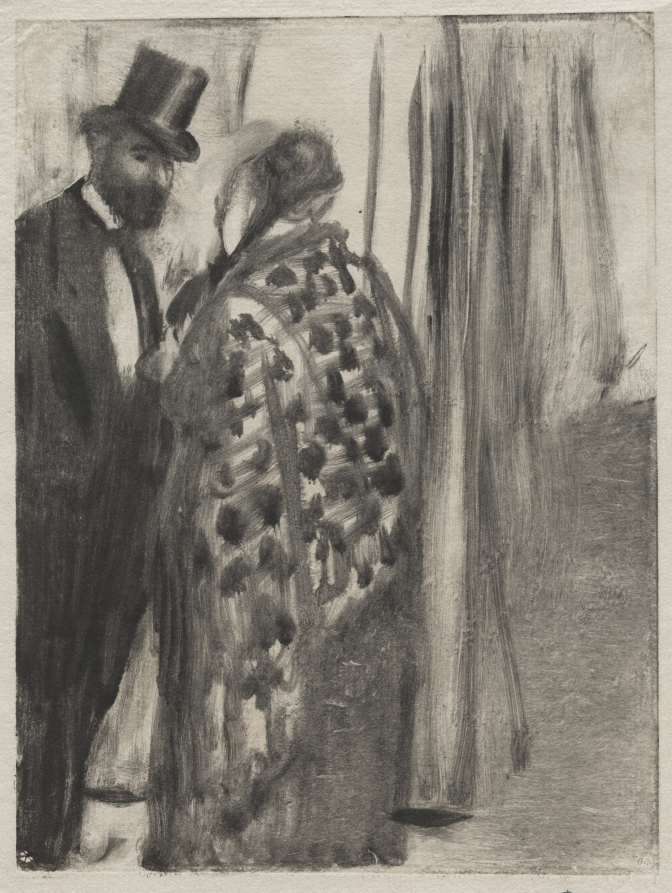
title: Conversation: Ludovic Halévy and Madame Cardinal (The Conversation) for "La Famille Cardinal" by Ludovic Halévy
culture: France, 19th century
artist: Edgar Degas (French, 1834–1917)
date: c. 1880–83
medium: monotype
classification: Print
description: This print comes from a series of more than 30 monotypes that Degas planned as illustrations for La Famille Cardinal by the artist’s friend Ludovic Halévy. The satirical stories revolve around two young dancers at the Opéra, Pauline and Virginie Cardinal, and their procuress mother. In late 19th-century Paris, the ballet was the profession of lower-class girls and young women who were available for sexual hire. Here, in the opening scene, Halévy, the first-person narrator, meets with Madame Cardinal in the coulisses (wings) of the Opéra to arrange for a private rendezvous with one of her daughters. The dancers, whose sexual availability is the subtext of the composition, are conspicuously absent.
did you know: Ludovic Halévy once co-authored a play, La Cigale, in which one of the characters was clearly based on Edgar Degas.